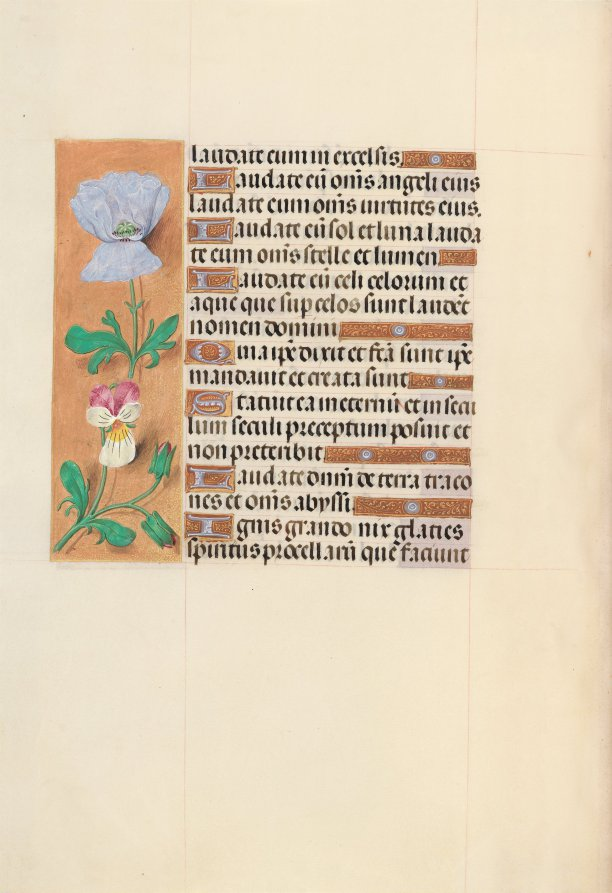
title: Hours of Queen Isabella the Catholic, Queen of Spain: Fol. 120v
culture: Flanders, Ghent and Bruges, late 15th century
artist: Master of the First Prayerbook of Maximillian (Flemish, c. 1444–1519)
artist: and Associates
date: c. 1500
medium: ink, tempera, and gold on vellum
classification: Bound Volume